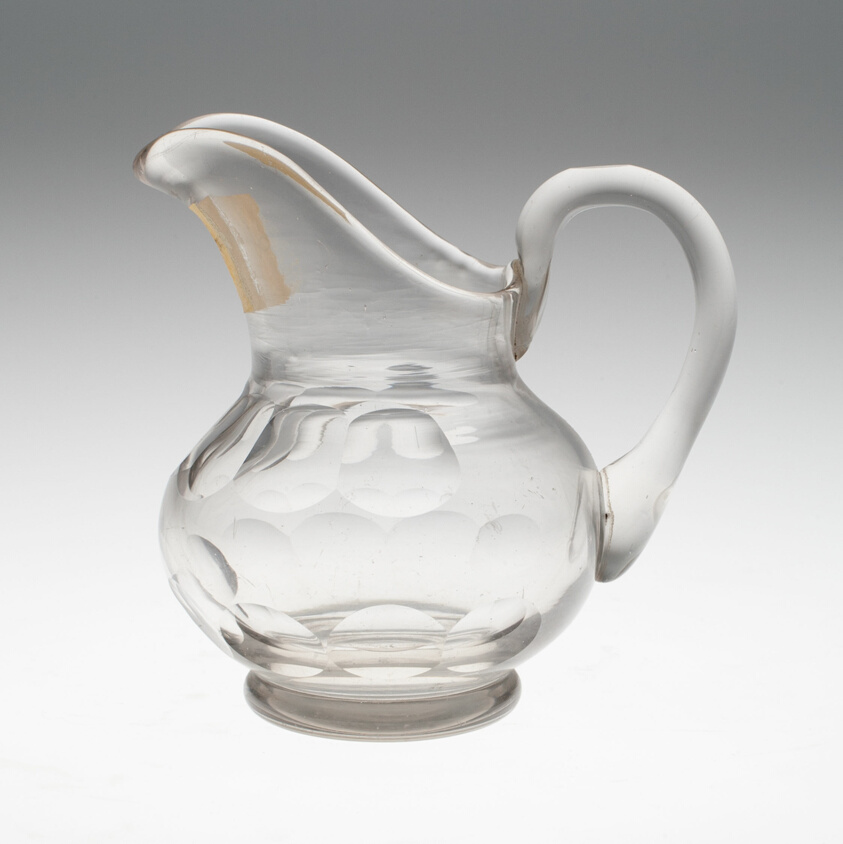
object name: Glass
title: Creamer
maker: France or United States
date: 19th century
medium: Glass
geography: France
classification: glass; european decorative arts